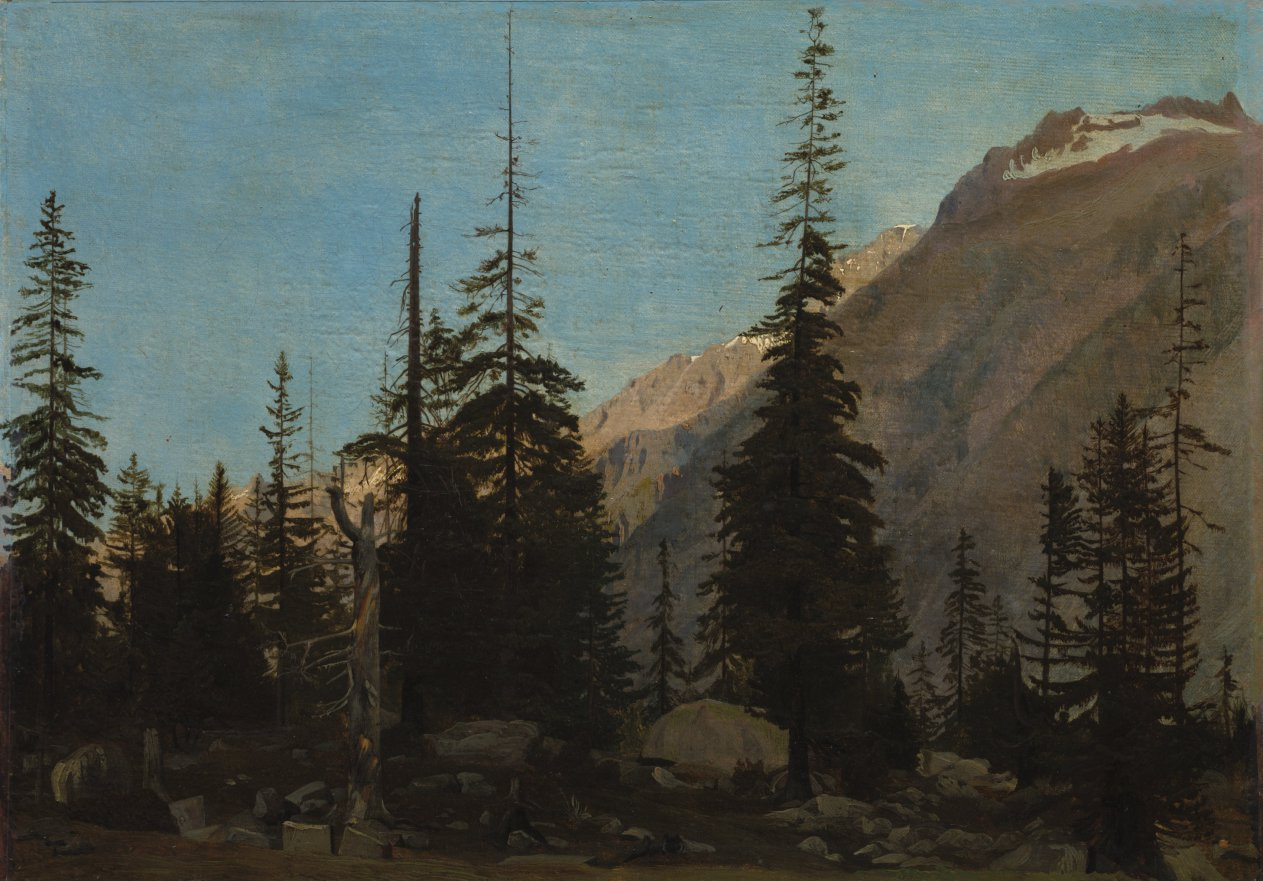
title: Alpine Landscape: The Handegg, Switzerland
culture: France, 19th century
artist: Jean-Léon Gérôme (French, 1824–1904)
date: 1850s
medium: oil on fabric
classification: Painting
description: This painting depicts a mountain peak near Handegg, a village just south of Lucerne, Switzerland. Tall fir trees reach upward from the dark foreground toward the light, which illuminates the sky and snowcapped mountains. Rising like church steeples, the trees almost touch the top of the canvas, conveying a feeling of spiritual striving. This expression of romantic, almost religious sentiment inspired by the power and beauty of nature is surprising for Gérôme, one of the leading artists of academic realism, a style distinguished by firm, precise drawing­.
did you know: In 1851, Gérôme decorated a vase for Emperor Napoleon III of France which was offered to Prince Albert of England and is now part of the Royal Collection at St. James’s Palace, London.